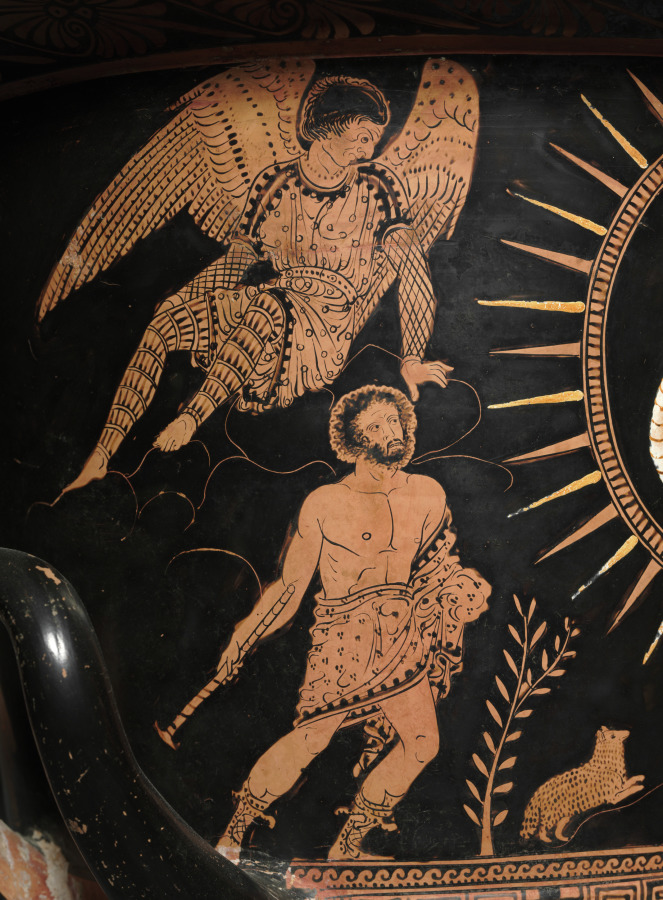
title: Red-Figure Calyx-Krater (Mixing Vessel): Medea in Chariot (A); Telephos with Baby Orestes (B)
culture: South Italian, Lucanian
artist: near the Policoro Painter (South Italian, Lucanian, active c. 400 BCE)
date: c. 400 BCE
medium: ceramic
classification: Ceramic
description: The remarkable scene on the front of this vase relates to the famous tragedy Medea, written by Euripides and first produced in Athens in 431 BC. Framed in the center by a halo (recalling her sun god grandfather Helios), the sorceress Medea flies off in a dragon-drawn chariot. Seeking revenge against her husband Jason, leader of the Argonauts, Medea has just slain their two children. Two Furies flank her, while Jason and a distraught nurse and teacher approach the bodies on the altar below. A different tragedy unfolds on the other side of the vase, from Euripides’s Telephos (438 BC). The wounded warrior Telephos holds the baby Orestes hostage at an altar, with Agamemnon and Clytemnestra rushing to save their son.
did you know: This vase includes scenes connected to two Athenian tragedies dealing with children—Medea and Telephos.